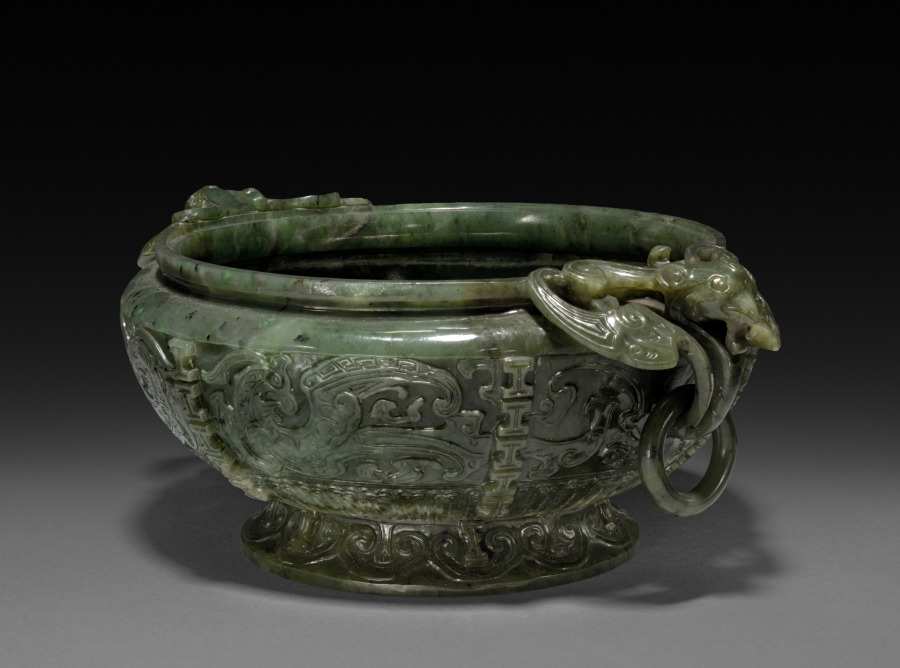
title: Koro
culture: China, Qing dynasty (1644–1911), Qianlong reign (1736–95)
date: 1736–95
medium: jade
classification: Jade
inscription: Qianglong mark on base